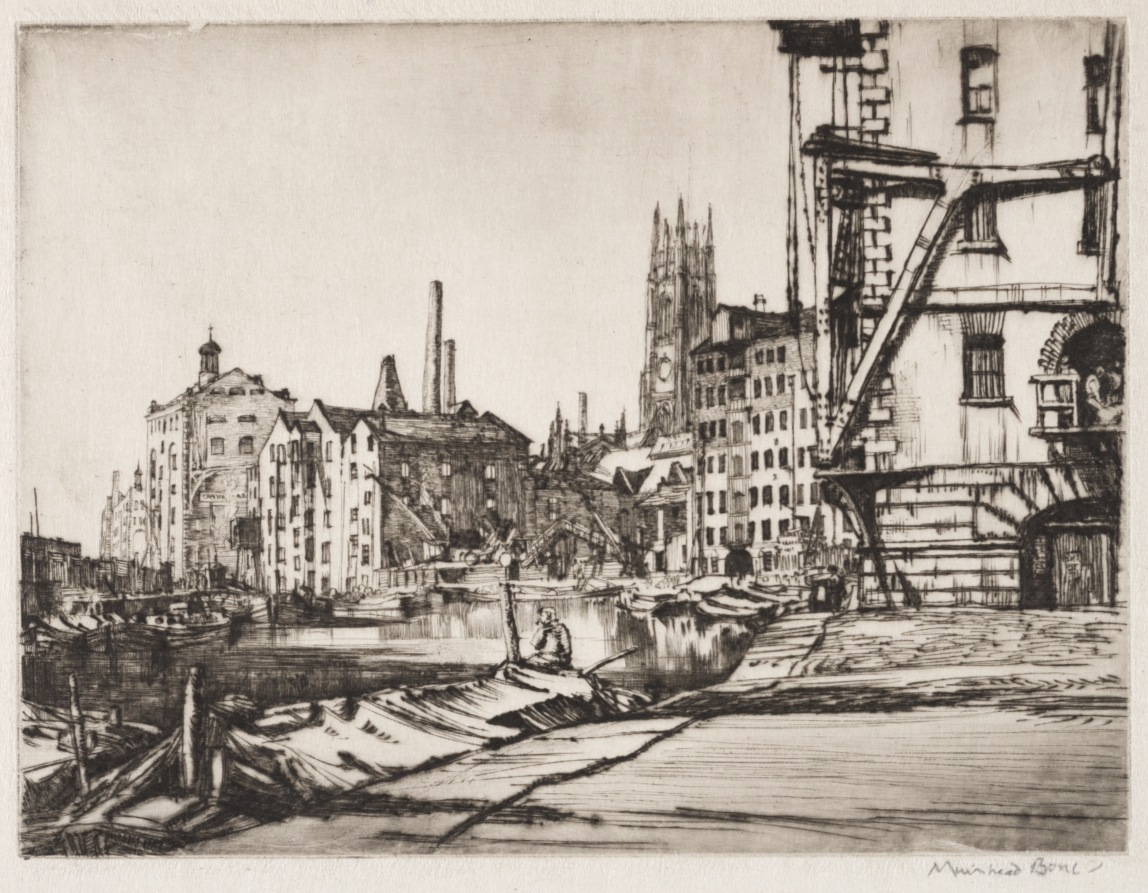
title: Leeds Warehouses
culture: England, early 20th Century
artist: Muirhead Bone (British, 1876–1953)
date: 1905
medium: drypoint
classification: Print